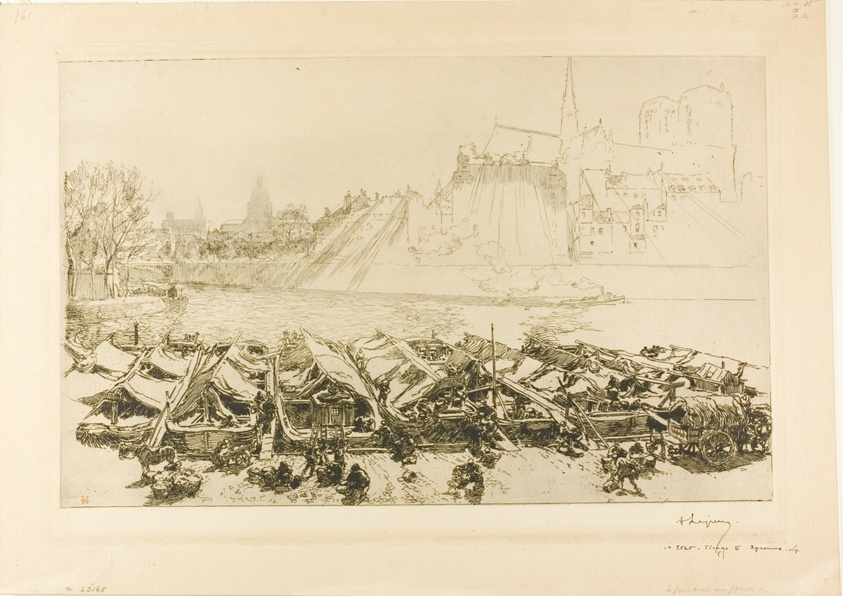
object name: Print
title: The Large Apple Market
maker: Louis Auguste Lepère (French, 1849-1918)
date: 1891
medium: Etching on tan wove paper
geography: France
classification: etching; print; prints and drawing